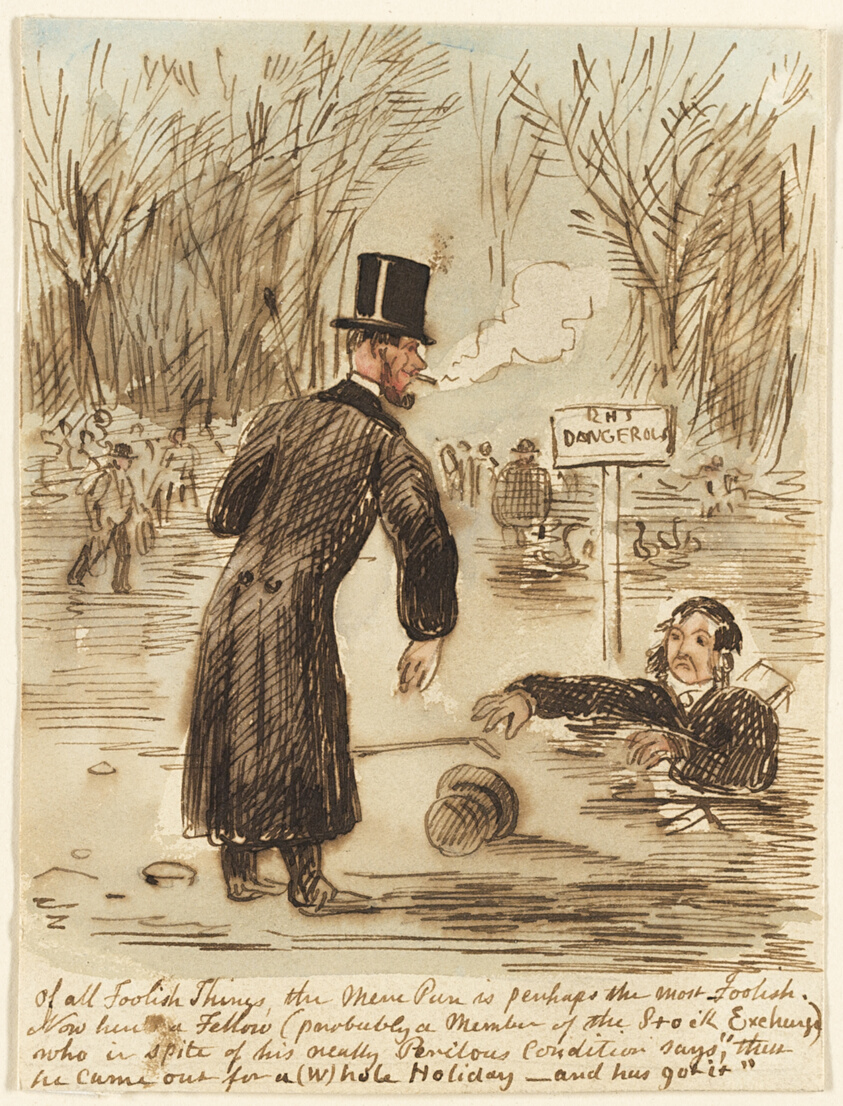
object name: Drawing and Watercolor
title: Of All Foolish Things...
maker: John Leech (English, 1817-1864)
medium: Watercolor and pen and brown ink, over graphite, on cream wove paper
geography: England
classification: watercolor; drawings (visual works); prints and drawing